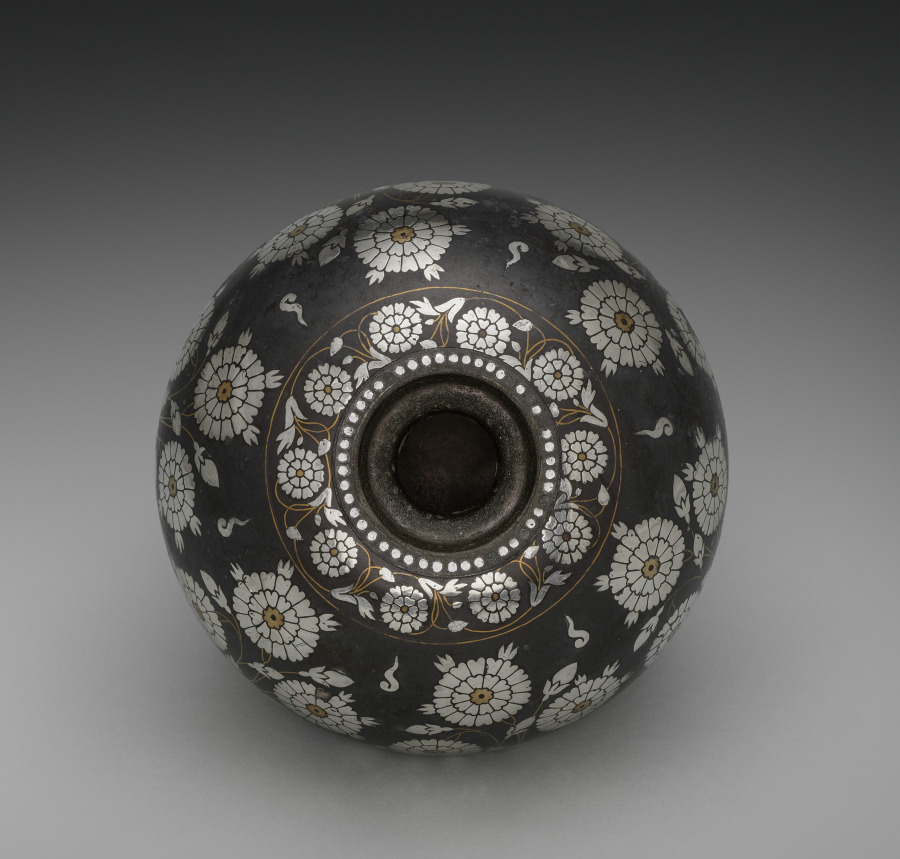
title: Bidri Hookah Bowl with Roses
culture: Southwestern India, Deccan, Karnataka, Bidar​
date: c. 1650s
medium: Zinc alloy with silver and brass inlay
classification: Metalwork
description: Hookah bowls were used for the enjoyment of tobacco or any other smoked substance during moments of relaxation. They were also aesthetic objects to be admired in elite gatherings of connoisseurs. The flowering rose bushes on this fine early example, made shortly after the introduction of tobacco-smoking in India, would have called to mind celebrated poetical works, such as the Gulistan (Rose Garden) of Sa'di (Persian, 1210–1291 or 1292).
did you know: Bidri ware is cast from condensed vapors of zinc mined from Sawar in Rajasthan.